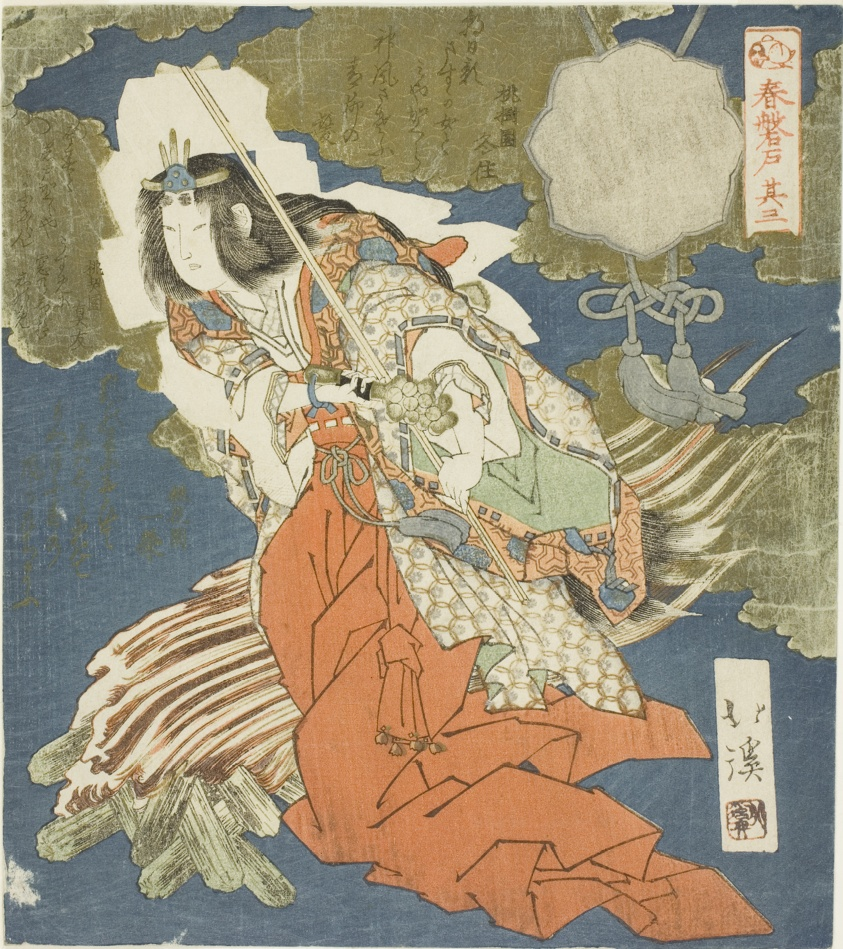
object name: Print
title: Ama no Uzume, No. 3 (Sono san) from the series "The Boulder Door of Spring (Haru no iwato)"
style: Japanese (culture or style)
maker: Totoya Hokkei (Japanese, 1780-1850)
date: 1820s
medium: Color woodblock print; shikishiban, surimono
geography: Japan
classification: woodblock print; print; asian art